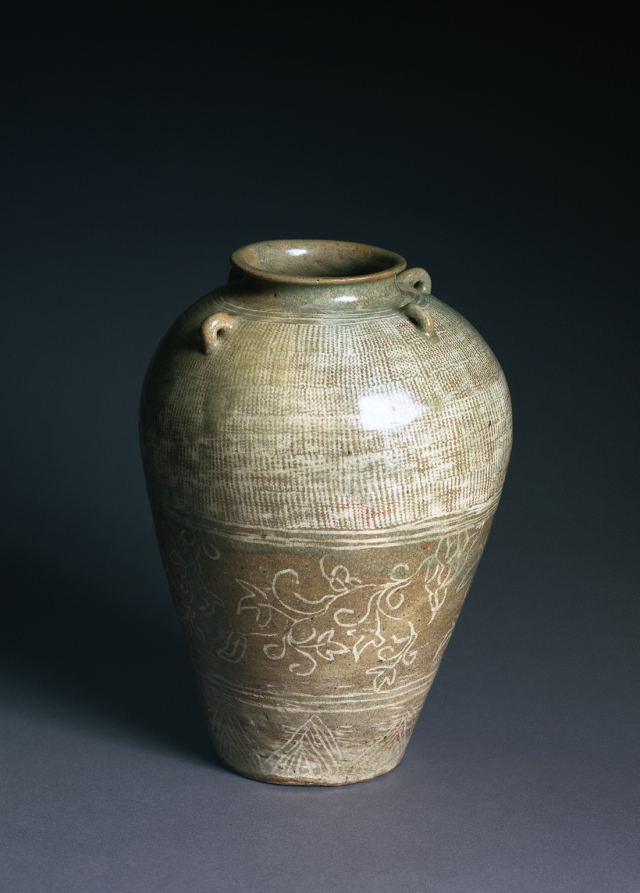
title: Jar with Scroll Design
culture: Korea, Joseon dynasty (1392–1910)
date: 1400s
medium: Buncheong ware with incised, stamped, and slip-inlaid decoration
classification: Ceramic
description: In premodern Korea, a newborn baby’s umbilical cord and placenta were believed to be a symbol of the life force of the fetus and thus kept in a specially arranged burial site. This jar was made exclusively for burying a placenta, a custom practiced by aristocratic families in Korea in the belief that it would bring happiness to the child.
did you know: The tiny ear-like handles located around the jar's shoulder allowing string to pass through were used to keep the lid (now missing) tightly closed.